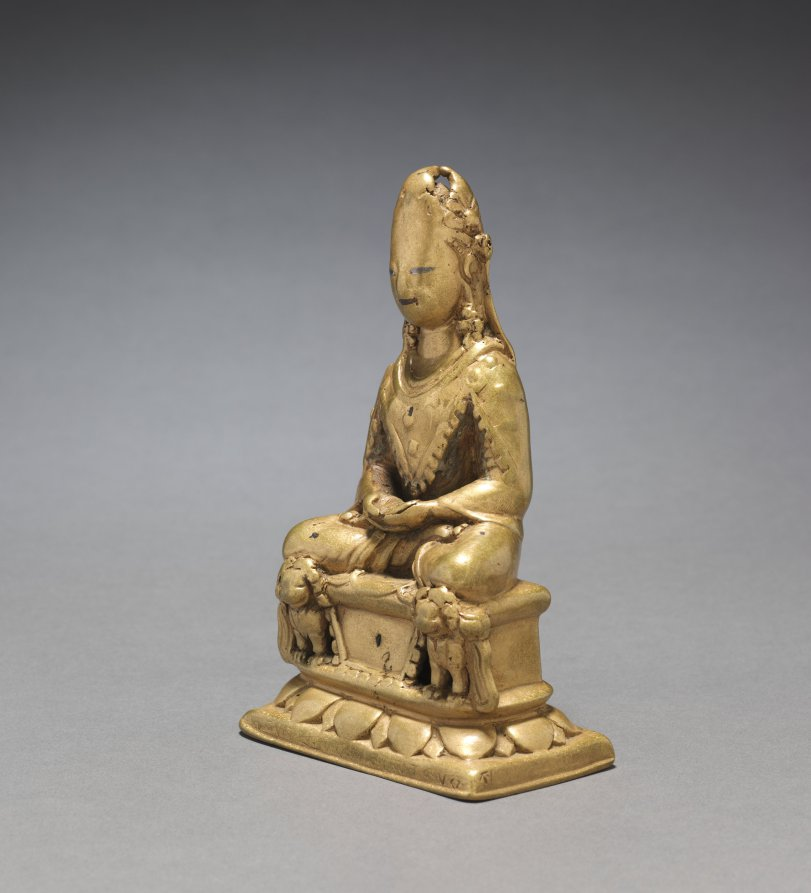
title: Crowned Buddha Seated on a Lion Throne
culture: India, Kashmir, 8th century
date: 700s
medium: brass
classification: Sculpture